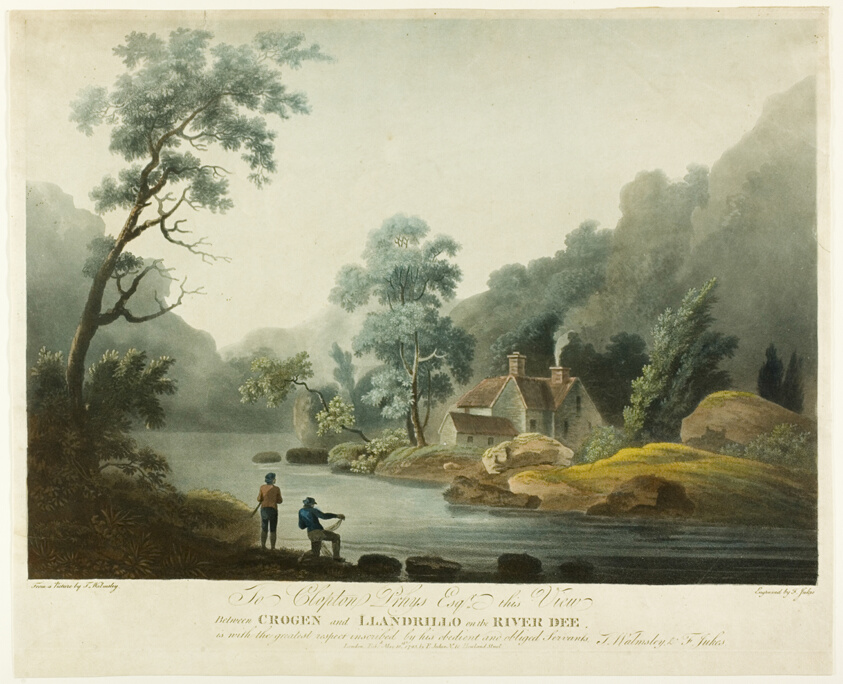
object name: Print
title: Between Crogen & Llandrillo on the R. Dee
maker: Francis Jukes (English, 1745-1812)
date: published 1793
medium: Color aquatint and etching on paper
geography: England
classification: aquatint; print; prints and drawing